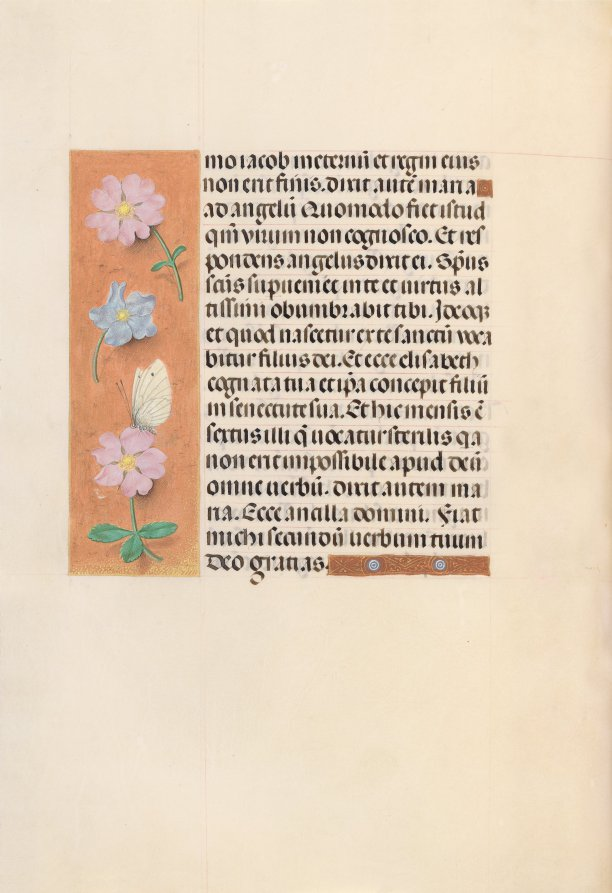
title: Hours of Queen Isabella the Catholic, Queen of Spain: Fol. 94v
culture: Flanders, Ghent and Bruges, late 15th century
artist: Master of the First Prayerbook of Maximillian (Flemish, c. 1444–1519)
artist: and Associates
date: c. 1500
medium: ink, tempera, and gold on vellum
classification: Bound Volume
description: This manuscript was illuminated by a circle of at least five highly organized manuscript painters active in the Flemish cities of Ghent and Bruges. The principal illuminator was Alexander Bening, who painted the majority of the book's miniatures. Manuscripts produced by this circle of artists are renowned for the decoration of their borders, which typically feature a rich variety of realistically-painted flowers, birds, and butterflies. This prayer book, called a book of hours, was intended not for a cleric, but for the private devotions of a lay person-in this case, Isabella the Catholic, Queen of Spain (1451-1504). Isabella's coat of arms embellishes the book's frontispiece. It is unlikely that the book was commissioned by the Queen herself; rather, she probably received it as a diplomatic gift from someone courting her patronage, perhaps Cardinal Francisco Jimenez de Cisneros. A Franciscan friar, Jimenez was dependent upon Isabella for his advancement, first to the post of Queen's confessor in 1492, and then to Archbishop of Toledo in 1495.